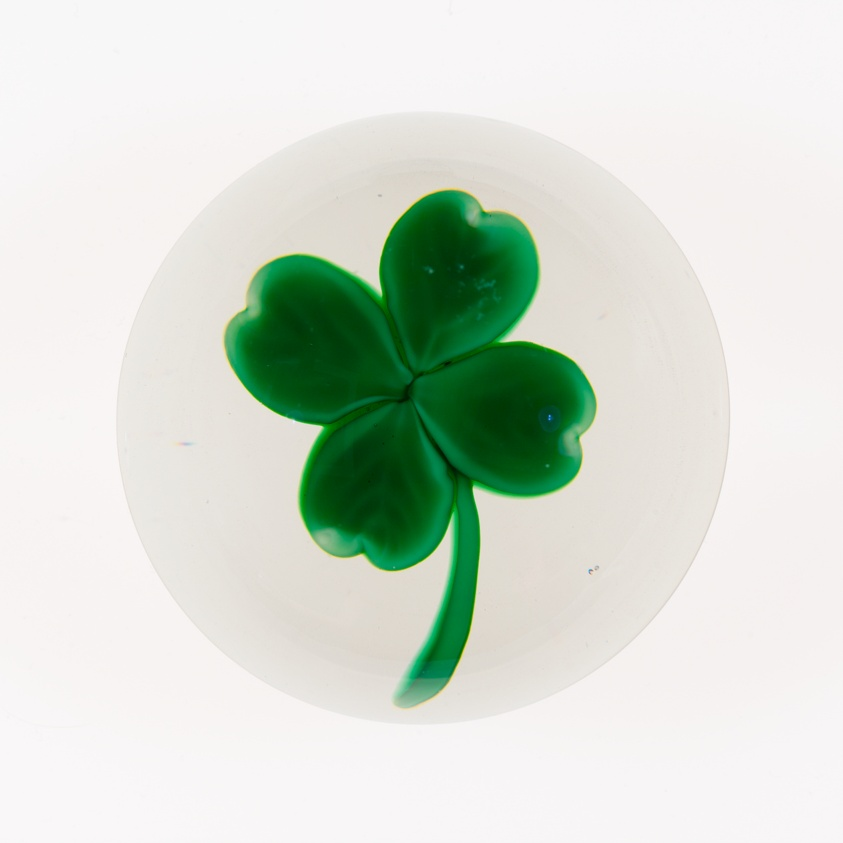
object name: Glass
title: Paperweight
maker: Baccarat Glassworks (Cristalleries de Baccarat); Lorraine, France, founded 1764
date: 19th century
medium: Glass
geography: France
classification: paperweight; glass